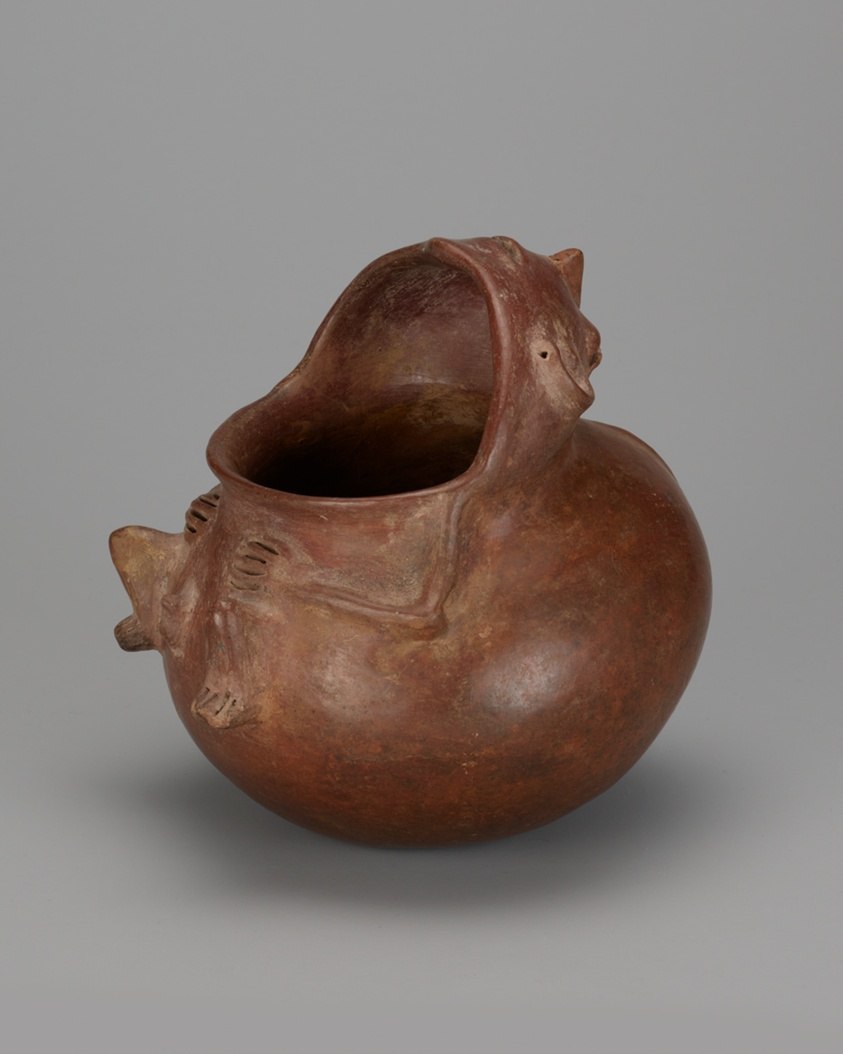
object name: Vessel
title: Vessel of a Male Figure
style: casas grandes, americas, Arts of the Americas, native american, native north american, southwest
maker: Ceramist unknown (Casas Grandes); New Mexico, United States, or Chihuahua, Mexico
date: 1280–1450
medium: Ceramic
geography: New Mexico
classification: vessel; art of the americas; ceramics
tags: figure, human figures